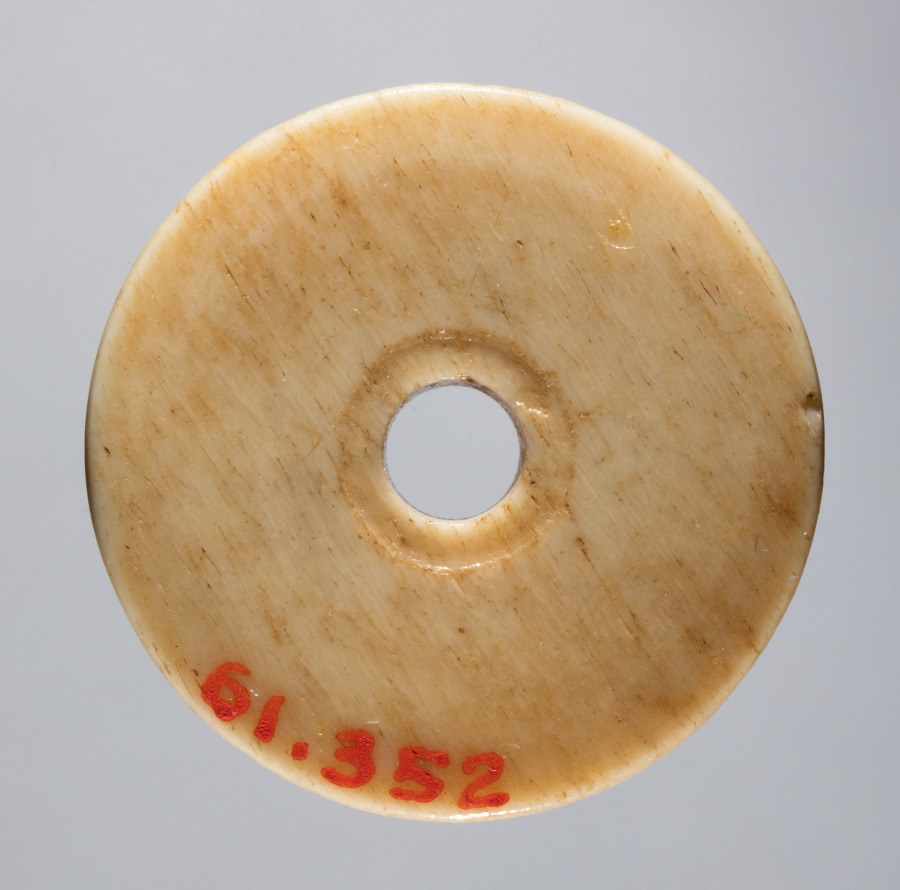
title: Spindle Whorl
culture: Iran, early Islamic period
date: 700s - 900s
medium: bone, incised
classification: Spindle Whorl